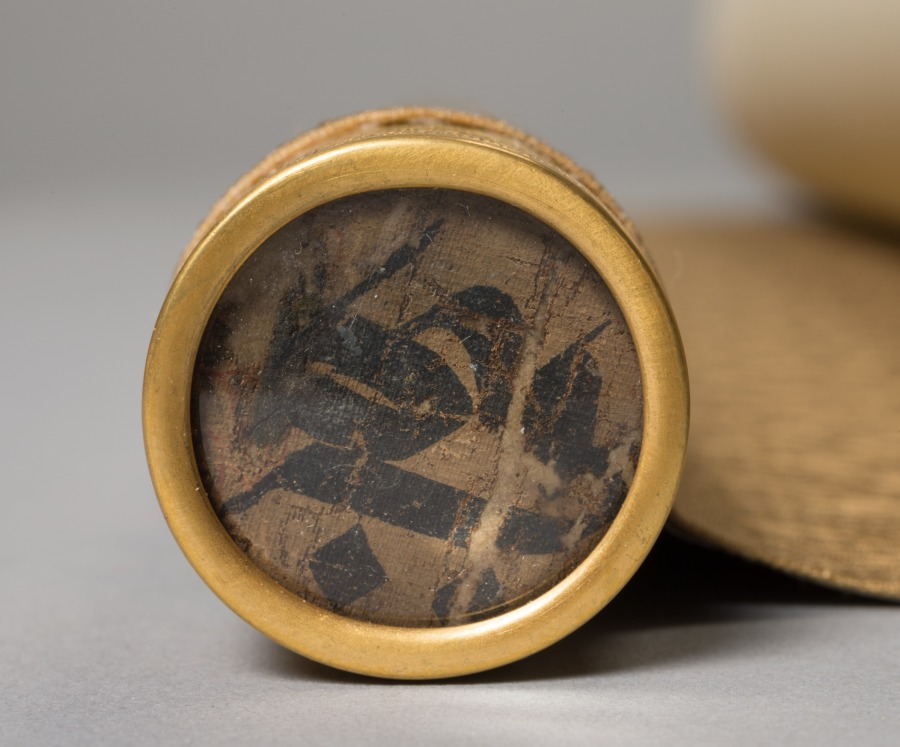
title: Eleven-Headed Kannon (Jūichimen Kannon)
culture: Japan, Kamakura period (1185–1333)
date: 1200s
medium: hanging scroll; color and cut gold (kirikane) on silk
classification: Painting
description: The Eleven-Headed Kannon, a deity of mercy and compassion in the Buddhist pantheon, was introduced into Japan in the 600s. By the 700s it had gained in popularity among an increasing number of believers, a condition it enjoyed until the end of the Kamakura period. The modest size and high quality of the materials apparent in this work indicate its use as a private devotional image. An earlier restoration of this painting included the use of an entire silk backing layer rather than silk patches with a paper backing. The tension that resulted between these two layers of silk, one old and the other recent, caused serious cracking to occur in the painting's surface. Moreover, the silk backing had been dyed a dark tone which did not enhance the appearance of the painting, although it did help hide damaged areas in the surface silk. Now two layers of backing paper support the painting, with its carefully fitted silk patches. These are toned slightly differently from the original surface values so that viewers can distinguish between the original and the modern restored areas. The original metal fittings have also been cleaned and reused. Other replacement fittings were deemed inappropriate for this early religious image and so new, specially designed ones are now in place.